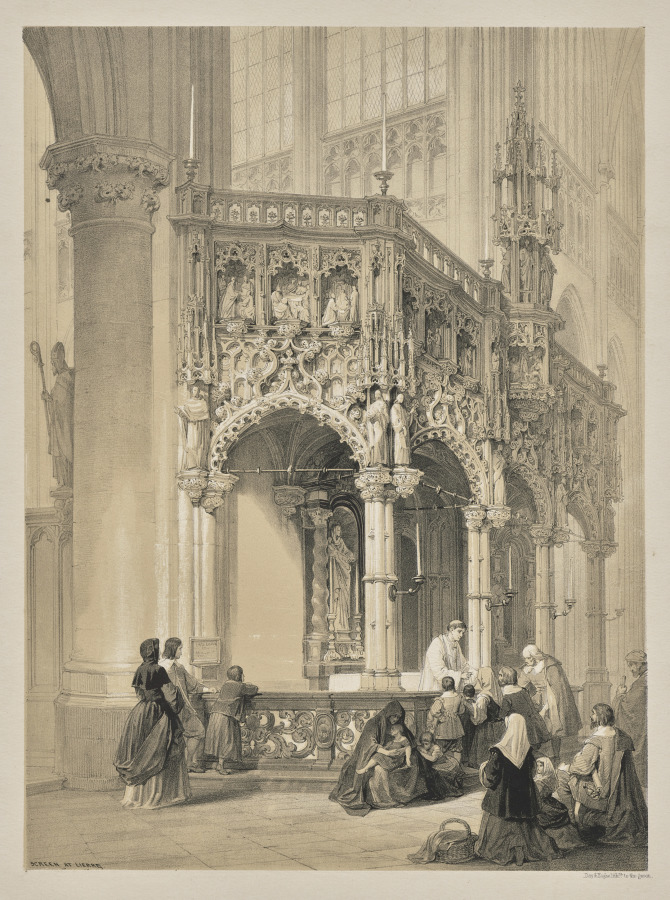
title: Sketches in Belgium and Germany, Second Series: No. 17 - Screens at Lierre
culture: England, 19th century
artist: Louis Haghe (British, 1806–1885)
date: 1845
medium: lithograph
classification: Print